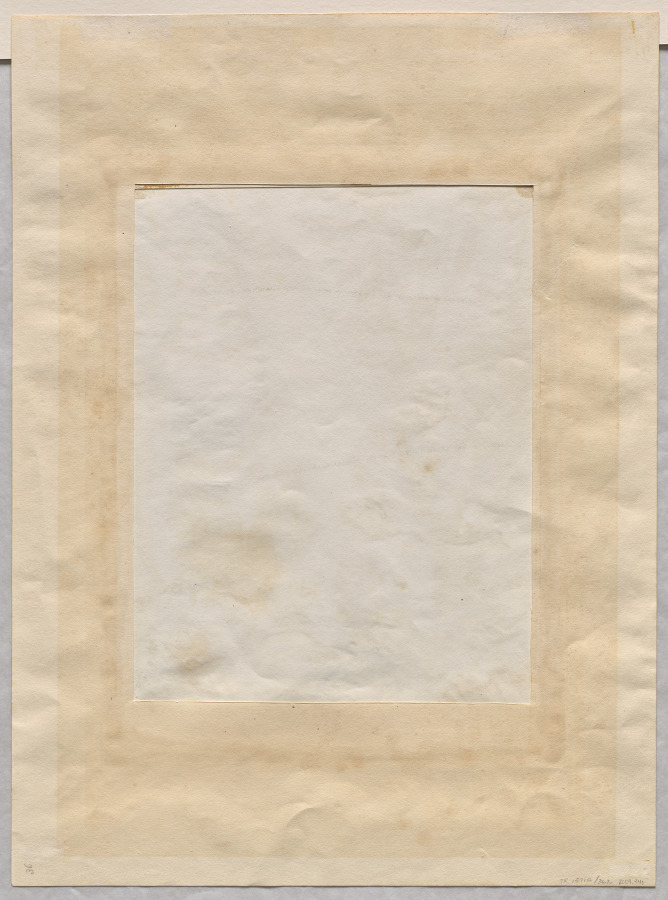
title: Hunstman with Trophies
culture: France, 19th century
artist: Hippolyte Lequeutre (French, 1793–1877)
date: 1800s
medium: watercolor and gouache over graphite, partly varnished, on woven paper, pasted down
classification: Drawing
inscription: The shrine is inscribed beneath the figure "h. heinrich" and is signed above the base "lequentre/Brunsee/1842;" inscribed on the mount at top in black ink, "Lequentre," and at the lower right "hommage de l'auteur"